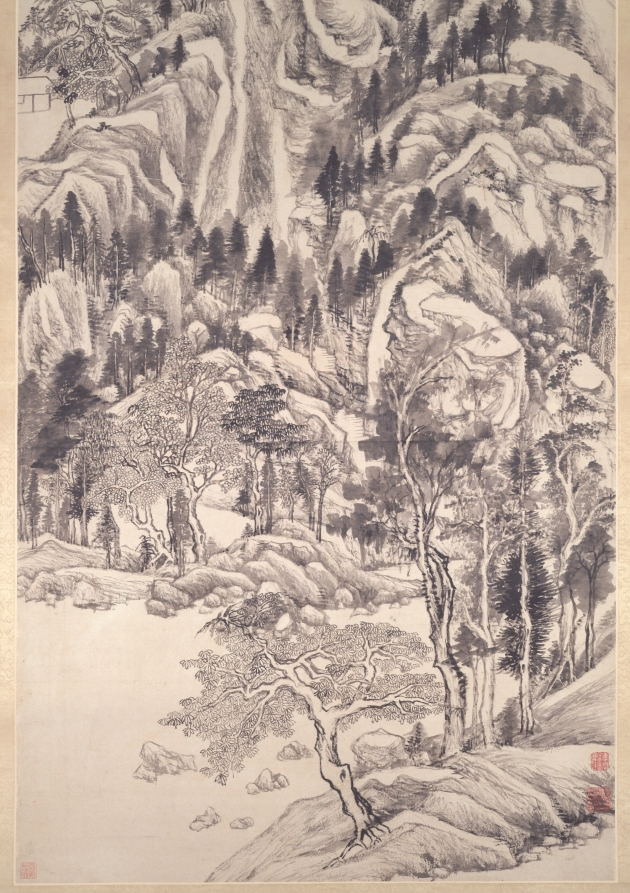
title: Mt. Qingbian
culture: China, Ming dynasty (1368–1644)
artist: Dong Qichang (Chinese, 1555–1636)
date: 1617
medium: hanging scroll, ink on paper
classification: Painting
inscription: Artist's first inscription, signature, and 2 seals: A painting of the Qingbian Mountains in the manner of Beiyuan [Dong Yuan]. In the summer of the dingsi year [1617], on the last day of the fifth month, [I] send this to my senior, Zhang Shenqi. Dong Xuanzai [seals] Zhi zhi hao ri jiang guan 知制誥日講官; Dong Qichang yin 董其昌印.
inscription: Artist's second inscription and signature: Piling irons for ten thousand feet guard the purple sky;/ Where puppies are seen on top of clouds, villages and marketplaces lie./ In the splendor of autumn, where is the most worthy spot to spend the day?/ Amid the rustling sounds of mountain streams, with a volume in hand, meditating on the Way [Dao]. Inscribed by Qichang. (trans. WKH/LYSL)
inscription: 4 additional seals: 3 of Li Enqing 李恩慶 (jinshi of 1833); 1 of Weng Wan-go 翁萬戈 (b. 1918).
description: Dong Qichang radically transforms the landscape composition into a purely abstract design. He organizes the mountain forms to achieve an overall sense of structure, activating the flow of energy (qi) and the momentum of force (shi) throughout the pictorial design. In his art, brush and ink assume life independent of the depicted forms, so that the painting can be appreciated for “the sheer marvels of brush and ink.”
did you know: Dong Qichang had visited the Bian Mountains, which are part of a low range located not far from Wuxing and Lake Tai in the southern province of Zhejiang.